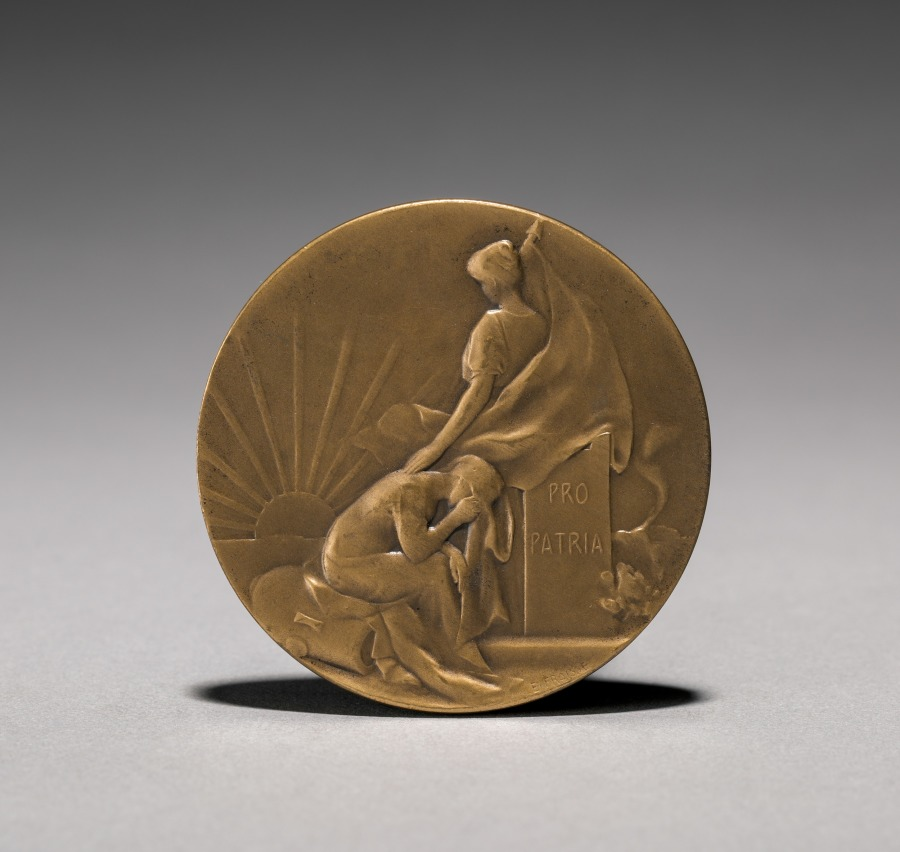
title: Medallion (obverse)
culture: France, 20th century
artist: Edouard Fraisse (French, 1880–1945)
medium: bronze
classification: Metalwork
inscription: "Pro Patria" (for the fatherland); signed: "E. Fraisse."